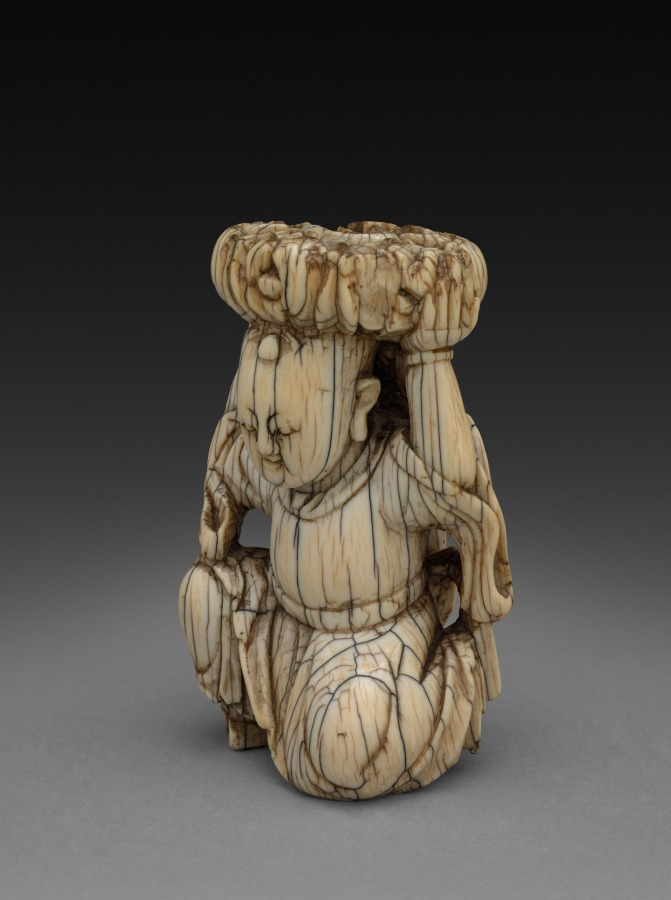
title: Kneeling Boy, Fragment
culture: China, Ming dynasty (1368–1644)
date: 1500s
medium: ivory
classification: Ivory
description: In the Ming dynasty (1368–1644), luxury items became more affordable to larger parts of the society, including women, merchants, and literati in non-official positions. Imperial patronage and a growing urban population encouraged consumption of luxury goods and local craftmanship. This ivory illustrates the superb carving skills and the creative mind of the skilled artisan who sought clients on a competitive market.